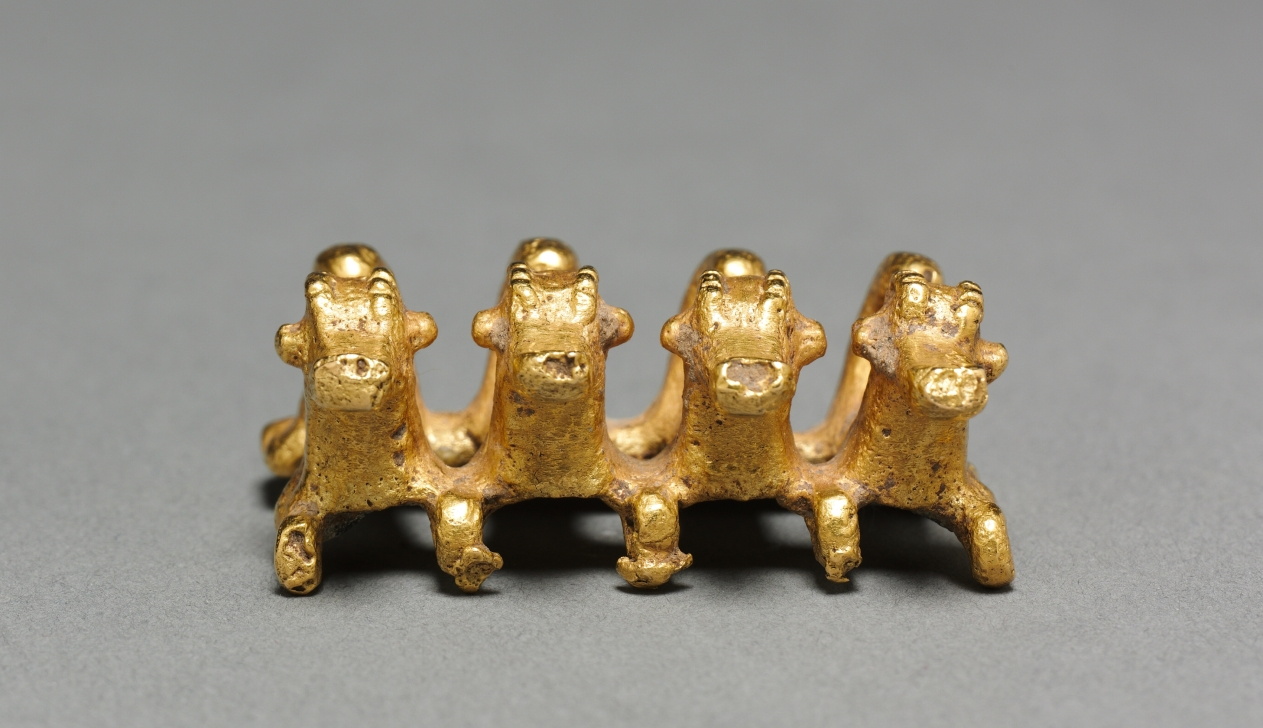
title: Curly-Tailed Animal Pendant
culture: Panama, Initial style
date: 100–800 CE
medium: gold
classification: Metalwork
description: A favored Initial-style subject is a charming animal whose curly tail -- its most impressive feature -- may derive from a monkey’s. Its other traits vary considerably, causing it to be identified as everything from a dog to a duck. Initial-style gold ornaments represent Panama’s oldest metalwork. Since metal technologies appeared suddenly and fully developed in Panama, it is likely that they were introduced from the outside, probably from Colombia to the south.